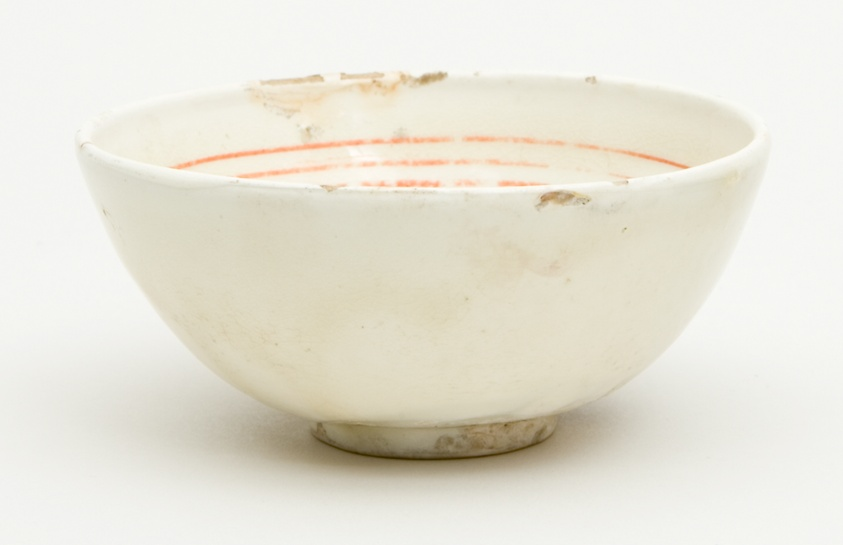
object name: Vessel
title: Bowl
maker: China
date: Jin dynasty (1115–1234), c. 13th century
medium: Cizhou ware, stoneware painted with white slip. iron-brown slip, overglaze enamels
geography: China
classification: vessel